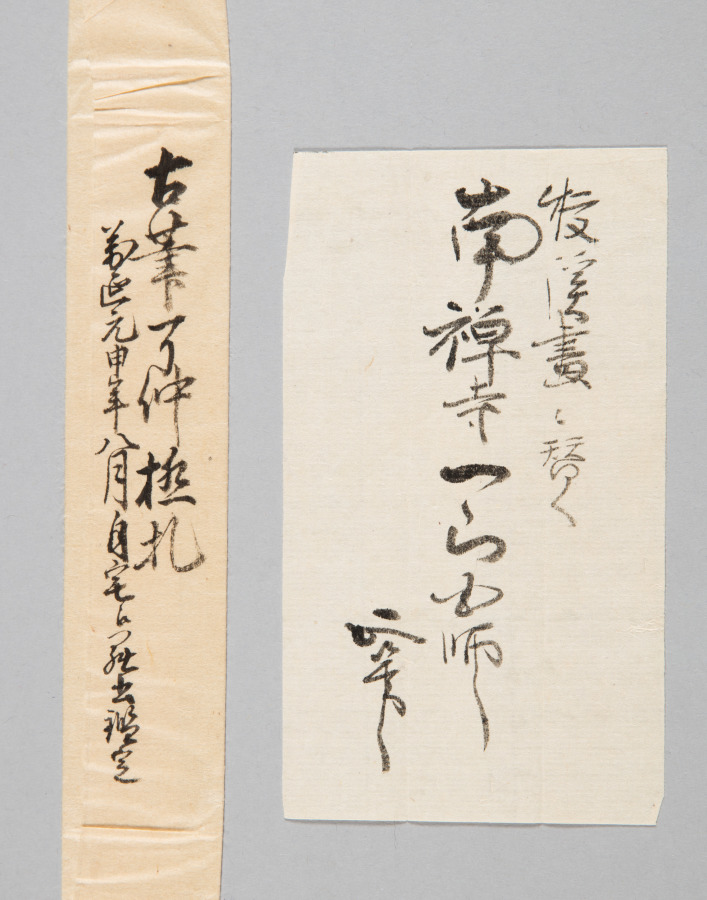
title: Reeds and Geese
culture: Japan, Kamakura period (1185–1333)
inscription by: Yishan Yining [Issan Ichinei] (Chinese, 1247–1317)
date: 1314–17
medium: hanging scroll; ink on paper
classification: Painting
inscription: signed: Issan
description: Reeds and geese has been a common pairing in Chinese literary and visual culture for many centuries. This painting presents the contribution of a Japanese amateur painter, almost certainly a Zen Buddhist monk, to Japan’s fledgling efforts to add the theme to its own cultural vocabulary in the early 1300s. As was customary at the time in Japan, the painter did not sign or seal his work; the inscription, a poem added to the painting by the eminent émigré monk Yishan Yining, along with his signature and seal, was of far greater cultural value. Today, the modestly sized painting has tremendous significance as one of the earliest surviving examples of Japanese ink paintings with reeds and geese.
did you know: Tokyo National Museum owns a copy of this painting made by Kano Gyokusen (1796–1864) when he was 14 years old.